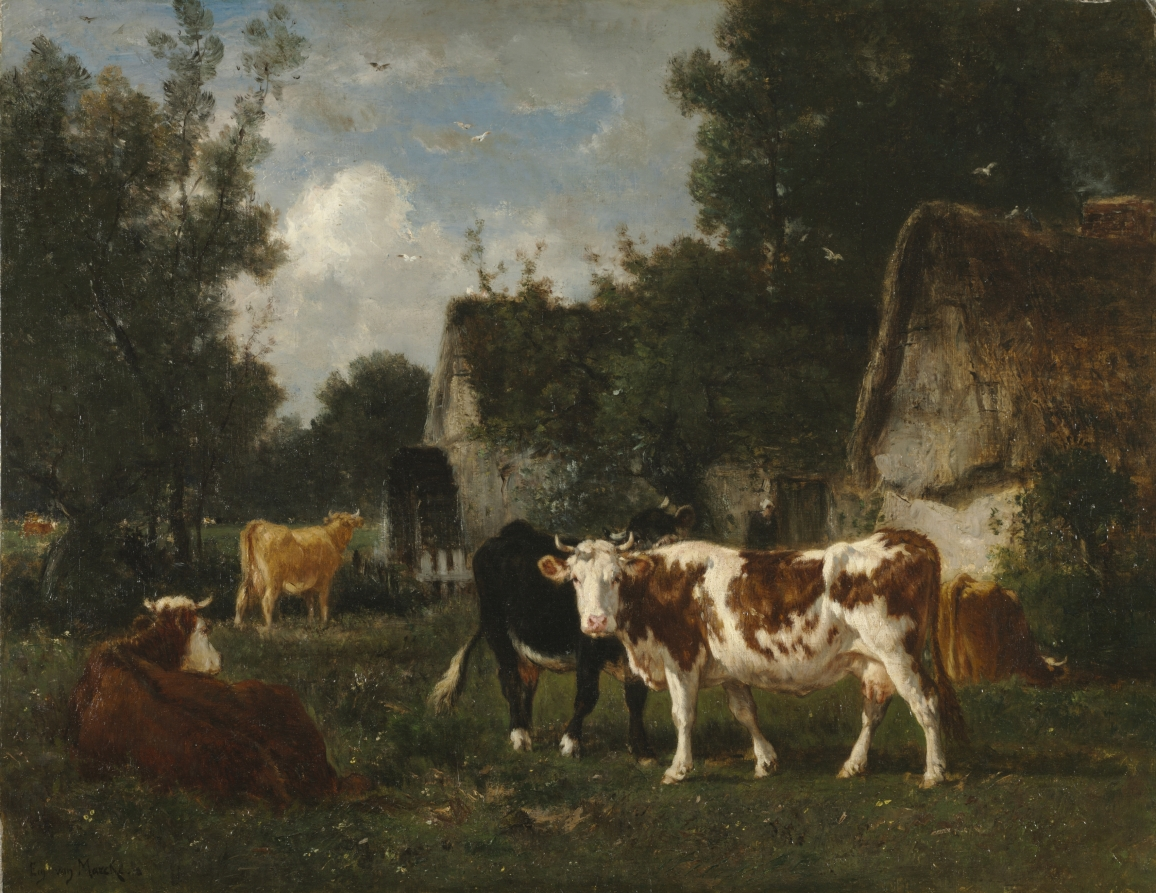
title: The Mill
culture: France, 19th century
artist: Émile van Marcke (French, 1827–1890)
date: 1873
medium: oil on fabric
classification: Painting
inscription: Signed lower left: Em van Marcke